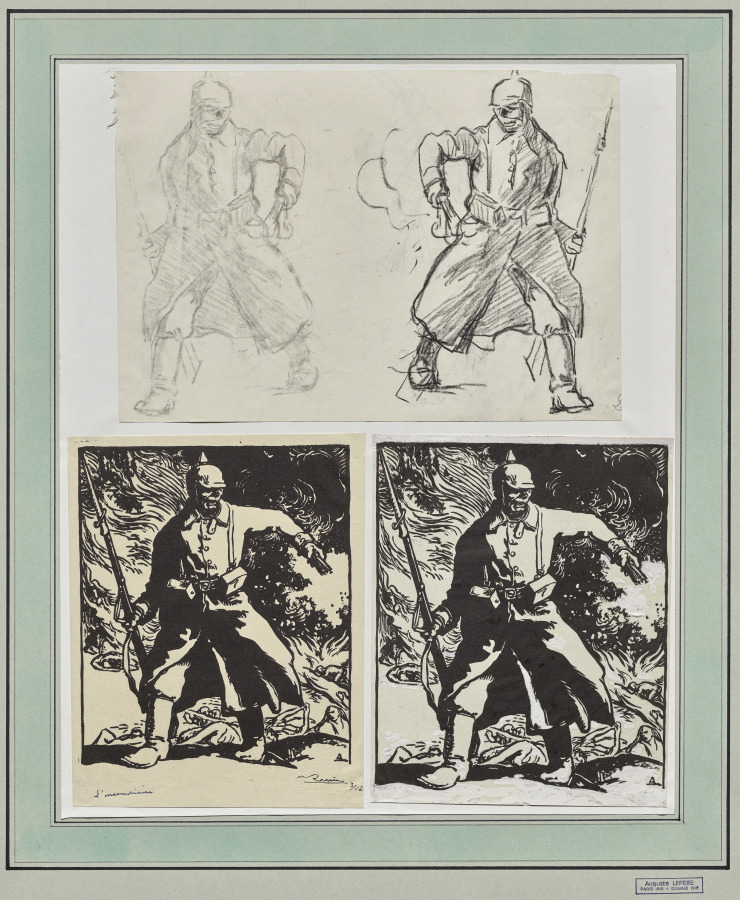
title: L'Incendiare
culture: France, 20th century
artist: Auguste Louis Lepère (French, 1849–1918)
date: 1914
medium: black crayon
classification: Drawing